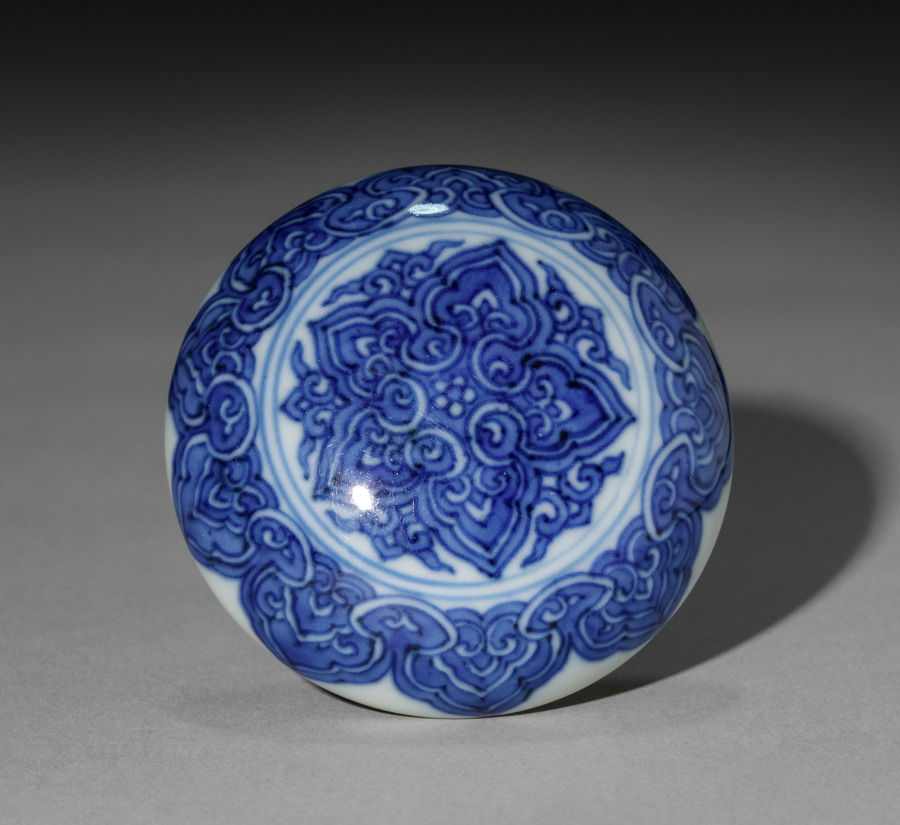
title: Round Covered Box with Medallions (lid)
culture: China, Jiangxi province, Jingdezhen kilns, Ming dynasty (1368-1644), Jiajing mark and reign (1522-66)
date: 1522–66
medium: porcelain with underglaze blue decoration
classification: Ceramic